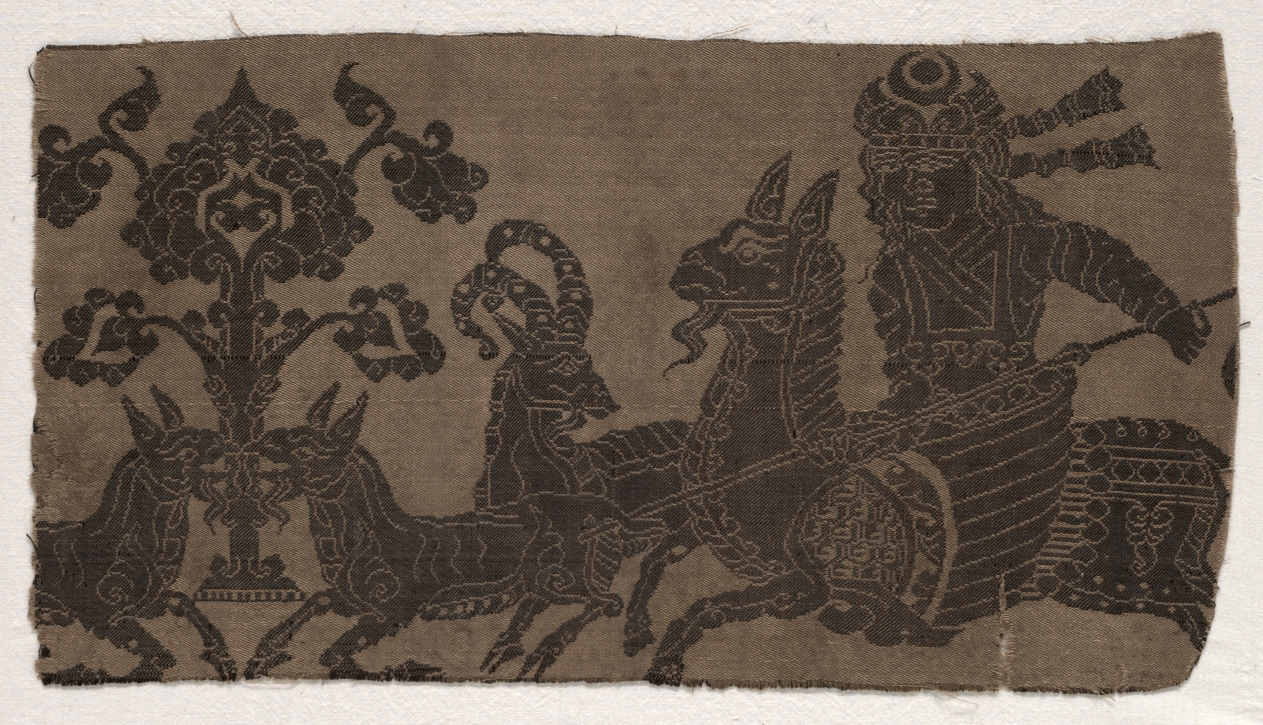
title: Fragment with Mounted Hunter Spearing Animals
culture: Iran, style of the Abbasid period (750–1258) or Buyid period (945–1055)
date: before 1982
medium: Silk: lampas weave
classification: Textile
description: The design originally consisted of a Tree of Life flanked by paired ibexes being pursued by a royal hunter. The latter, mounted on a fantastic creature, wears a Sasanian crown and holds a long spear. The fragment preserves most of the design to the right of the central tree, but only half of an ibex to the left of the tree.